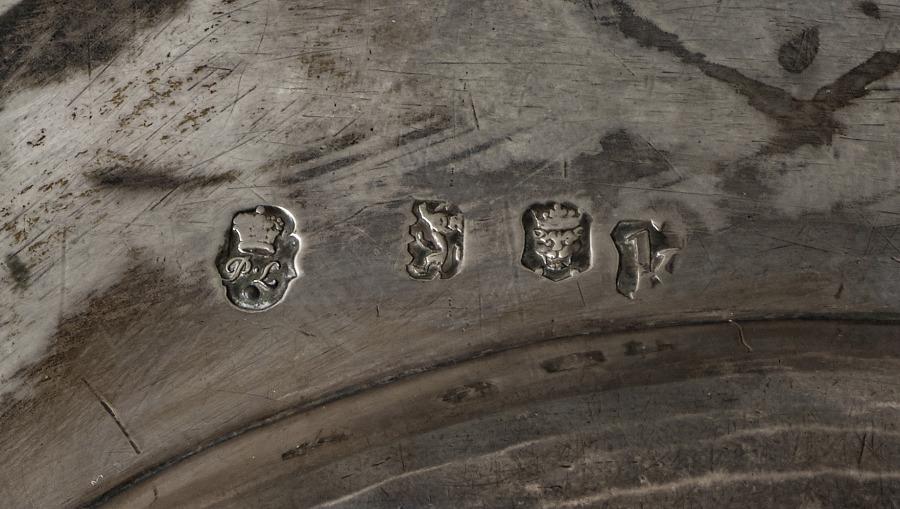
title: Tray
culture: England, 18th century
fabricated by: Paul Jacques de Lamerie (British, 1688–1751)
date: 1745–1746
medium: silver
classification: Silver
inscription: Scratched underside: "No 4.", "41 = 0 1/2".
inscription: Two crests engraved on either side of face: A lion and the other states, "Tout Est Vanite".